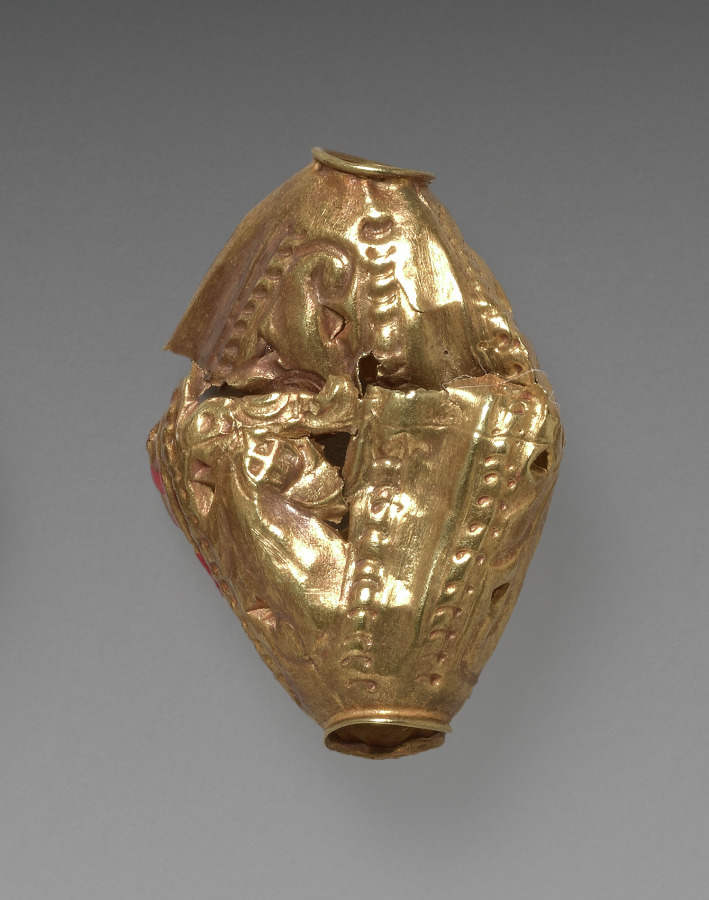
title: Bead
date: after 1519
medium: gold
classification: Jewelry